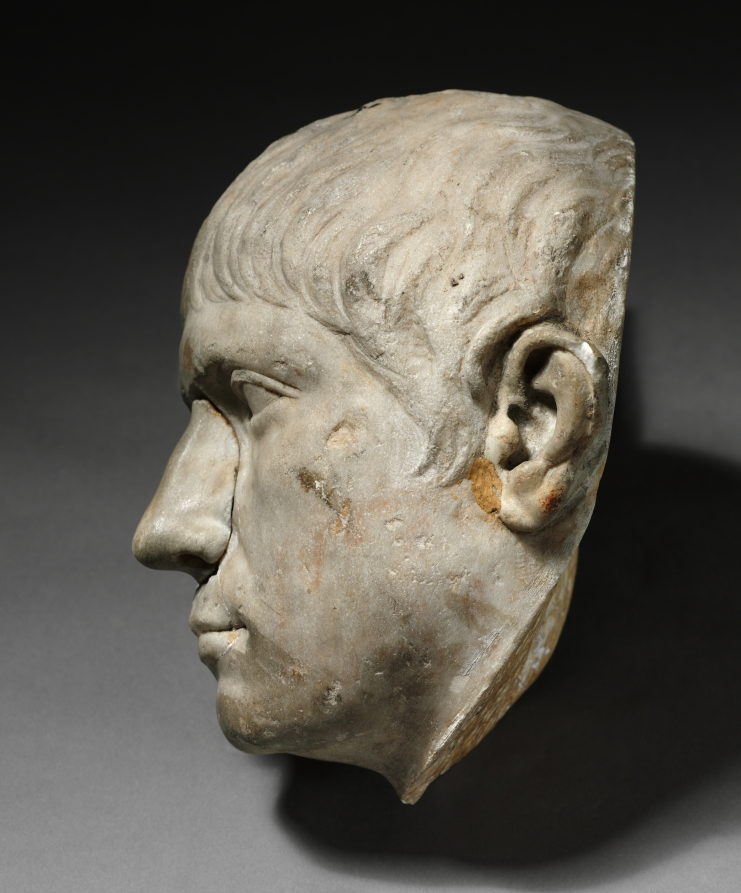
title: Bust of a Man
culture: Italy, Face: Roman, early 2nd century or later; Body: 16th century or later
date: Face: early 2nd century or later. Body: 1500s or later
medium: marble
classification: Sculpture